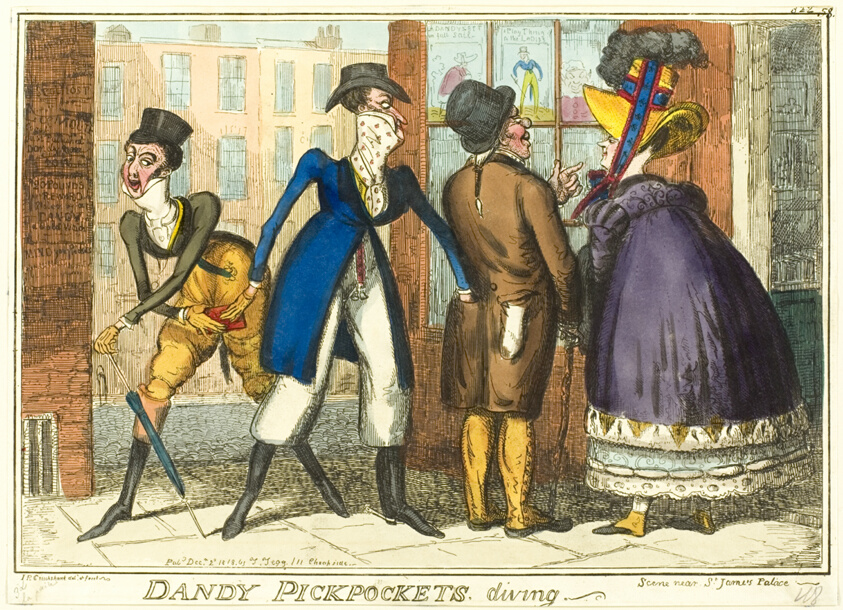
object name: Print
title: Dandy Pickpockets Diving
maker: Isaac Robert Cruikshank (English, 1789-1856); published by Thomas Tegg (English, 1776-1846)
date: published December 2, 1818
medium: Hand-colored etching on paper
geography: England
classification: etching; print; prints and drawing